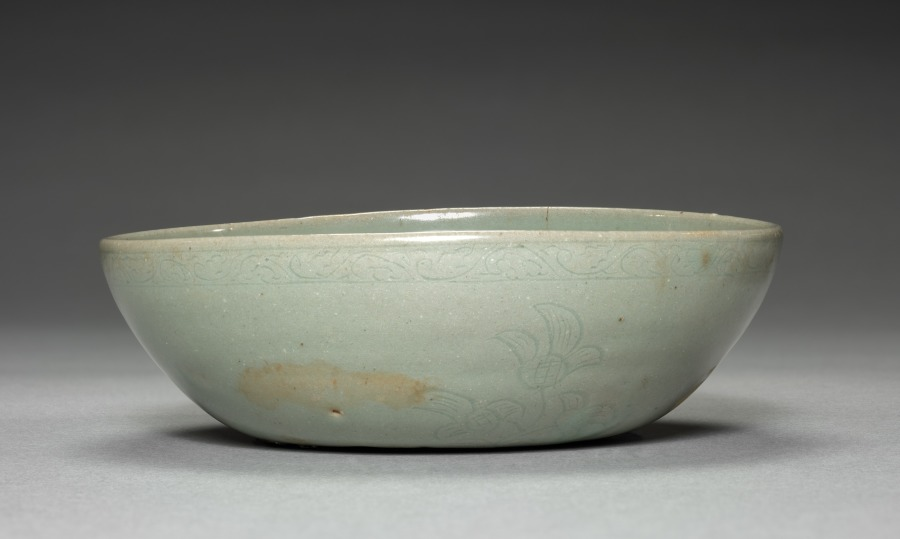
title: Dish with Incised Floral Design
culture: Korea, Goryeo dynasty (918–1392)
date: 1100s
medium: glazed porcelain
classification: Ceramic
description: Celadon wares used for everyday such as this dish were among the most common burial objects in tombs during the Goryeo period (918–1392). Furnishing tombs with an elaborate assemblage of objects was believed to honor and comfort the newly dead. Generally, Goryeo tombs were left untouched until the late 1800s. During the colonial period (1910–45), however, Japanese archaeologists competitively excavated the tombs located in Kaeseong, the former capital of the Goryeo period, and these wares soon became available for Japanese and Western collectors.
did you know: The translucent greenish and bluish glaze of Goryeo celadons, shown in this vase, is the result of distinctive small and long Korean kilns, which maintained a low oxygen saturation with a high level of carbon dioxide.